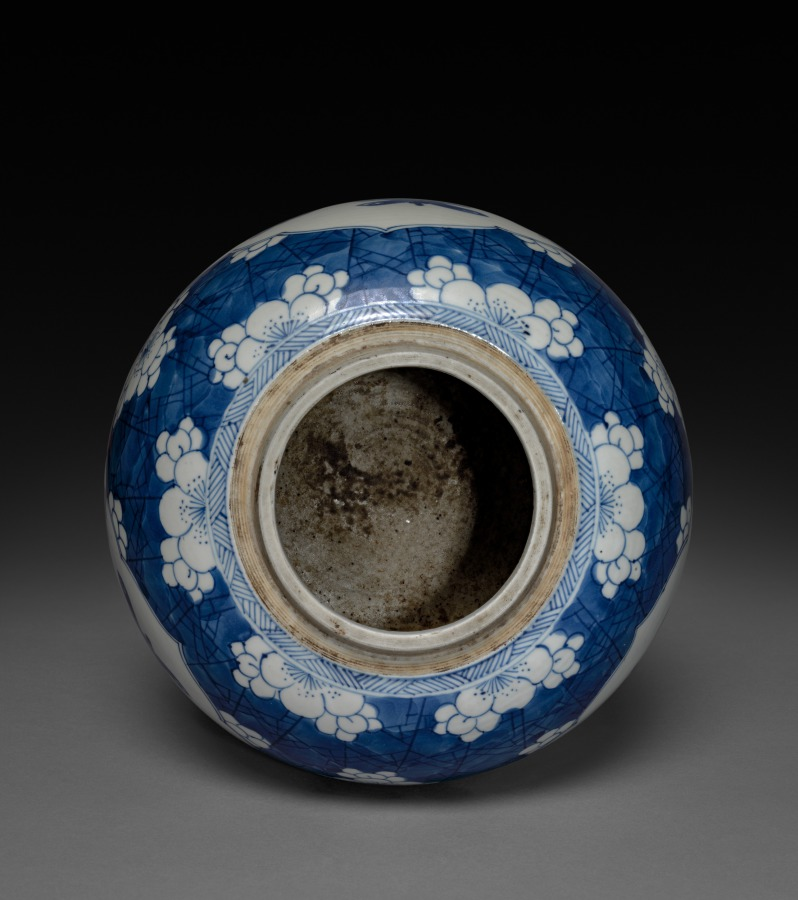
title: Ginger Jar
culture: China, Qing dynasty (1644-1911), Kangxi reign (1662-1722)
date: 1662–1722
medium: porcelain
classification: Ceramic